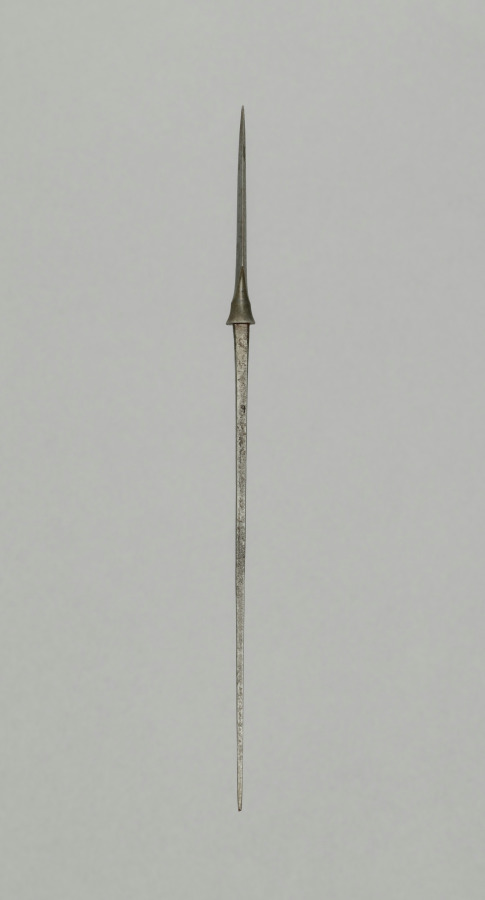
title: Arrow Point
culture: Japan, Edo period (1615–1868)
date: 1700s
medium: steel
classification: Arms and Armor